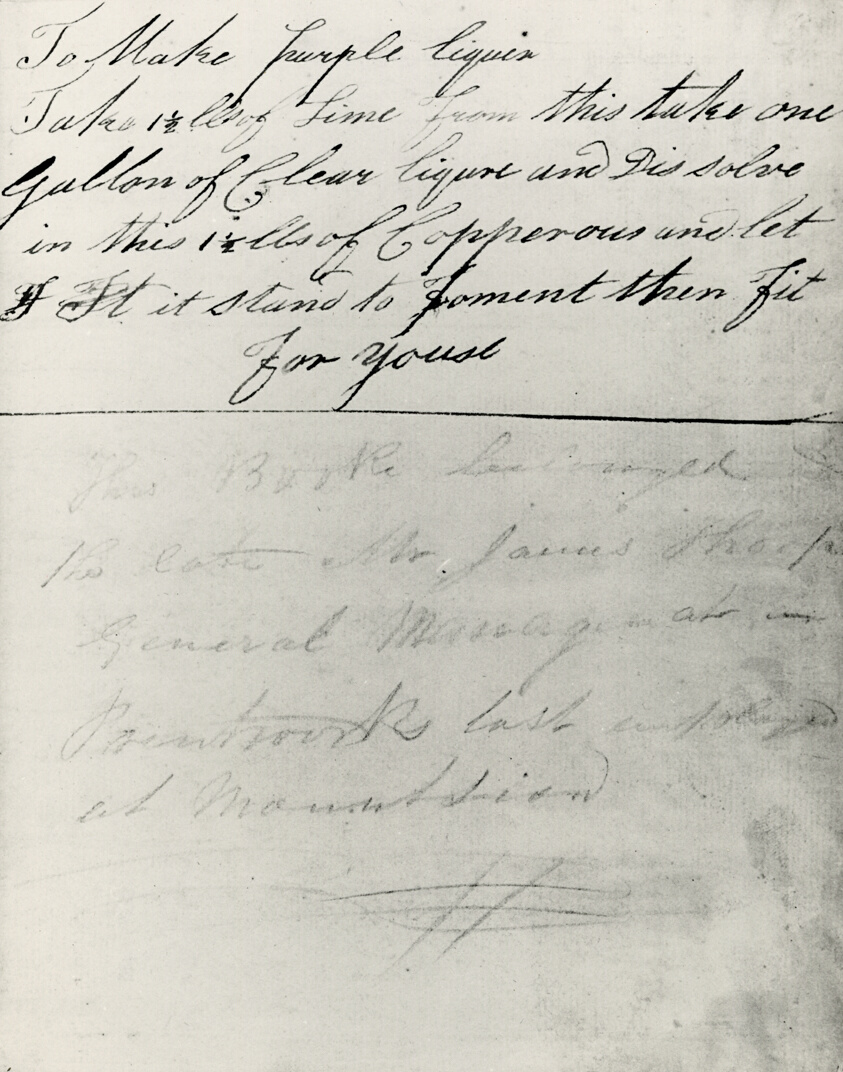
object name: Book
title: Book of Dye Recipes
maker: United States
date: 19th century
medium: Paper; sepia ink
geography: United States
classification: textile; book; printed textile